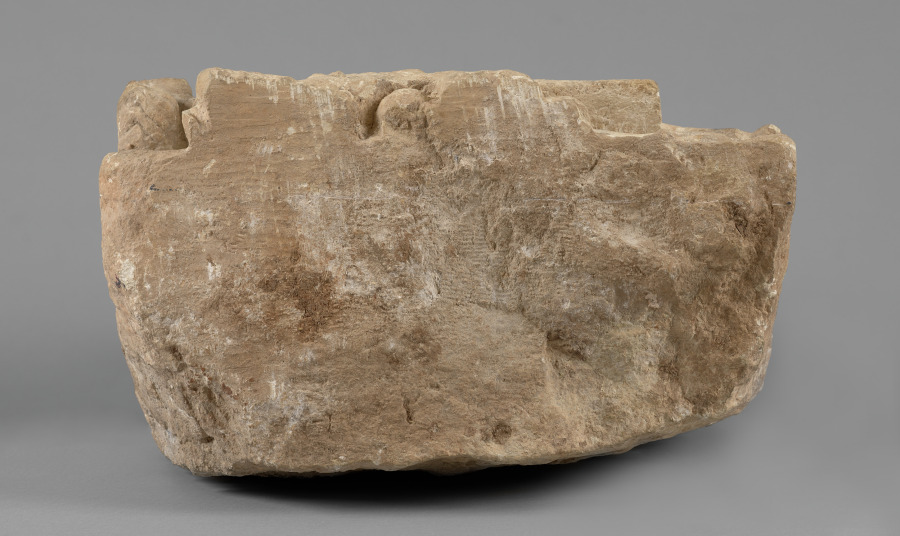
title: Procession of Nobles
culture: Syria, Palmyra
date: 100–150 CE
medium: limestone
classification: Sculpture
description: Palmyra was a key center for trade between the Roman and Parthian Empires. This unique relief has been associated with Palmyra only through stylistic comparisons; it is not known where it was found on the site. It depicts men in Parthian dress riding Arabian horses with bejeweled harness trappings ahead of riders on camels—a possible reference to the caravans that made Palmyra so wealthy. Although all of the riders are dressed and equipped as Parthians, the proportions and perspective of the scene seem to be informed by Greco-Roman conventions. It may depict a ceremonial procession.